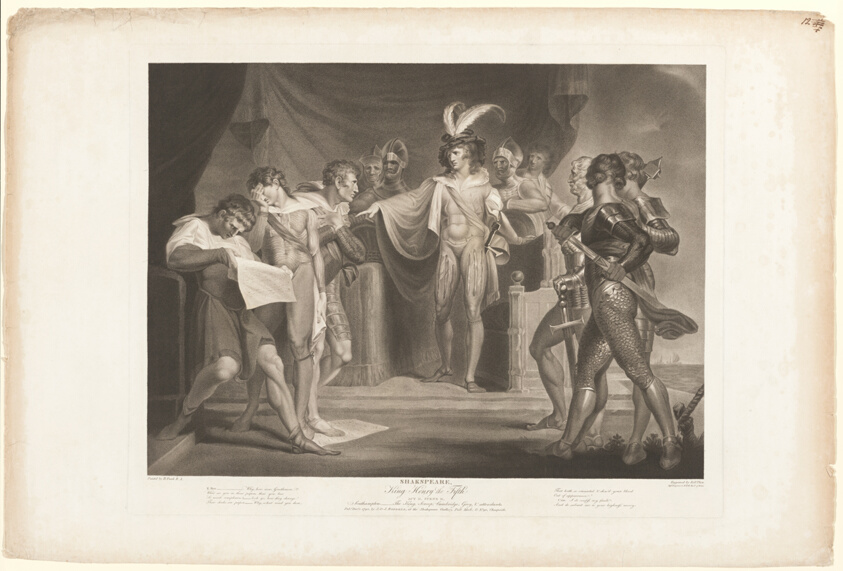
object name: Print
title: King Henry Condemning Cambridge, Scroop and Northumberland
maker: Robert Thew (English, 1758-1802); after Henry Fuseli (Swiss, active in England, 1741-1825); published by John Boydell (English, 1719-1804); authored by William Shakespeare (English, 1564-1616)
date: 1798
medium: Etching and stipple on ivory wove paper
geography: England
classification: engraving; print; prints and drawing